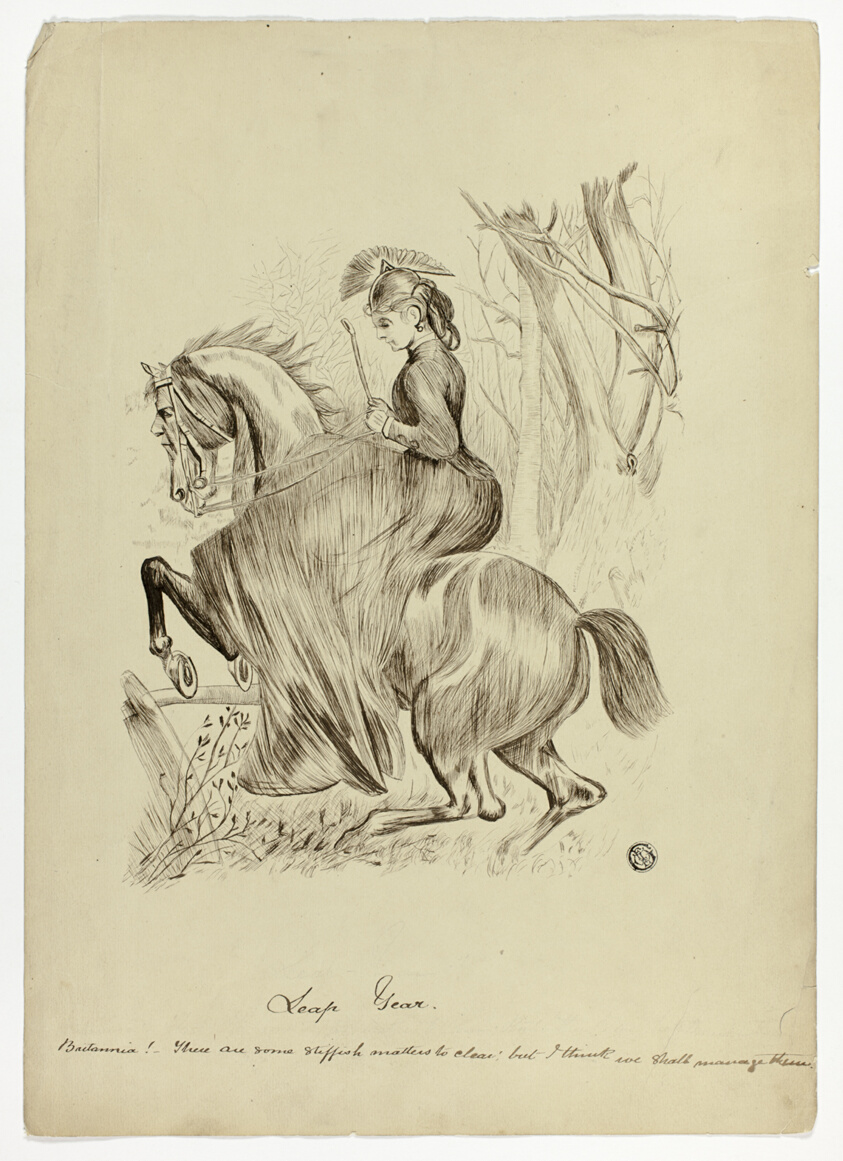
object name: Drawing and Watercolor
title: Leap Year, Britannia!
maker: Possibly after Sir John Tenniel; English, 1820-1914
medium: Pen and brown ink on tan wove paper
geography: England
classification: pen and ink drawings; drawings (visual works); prints and drawing